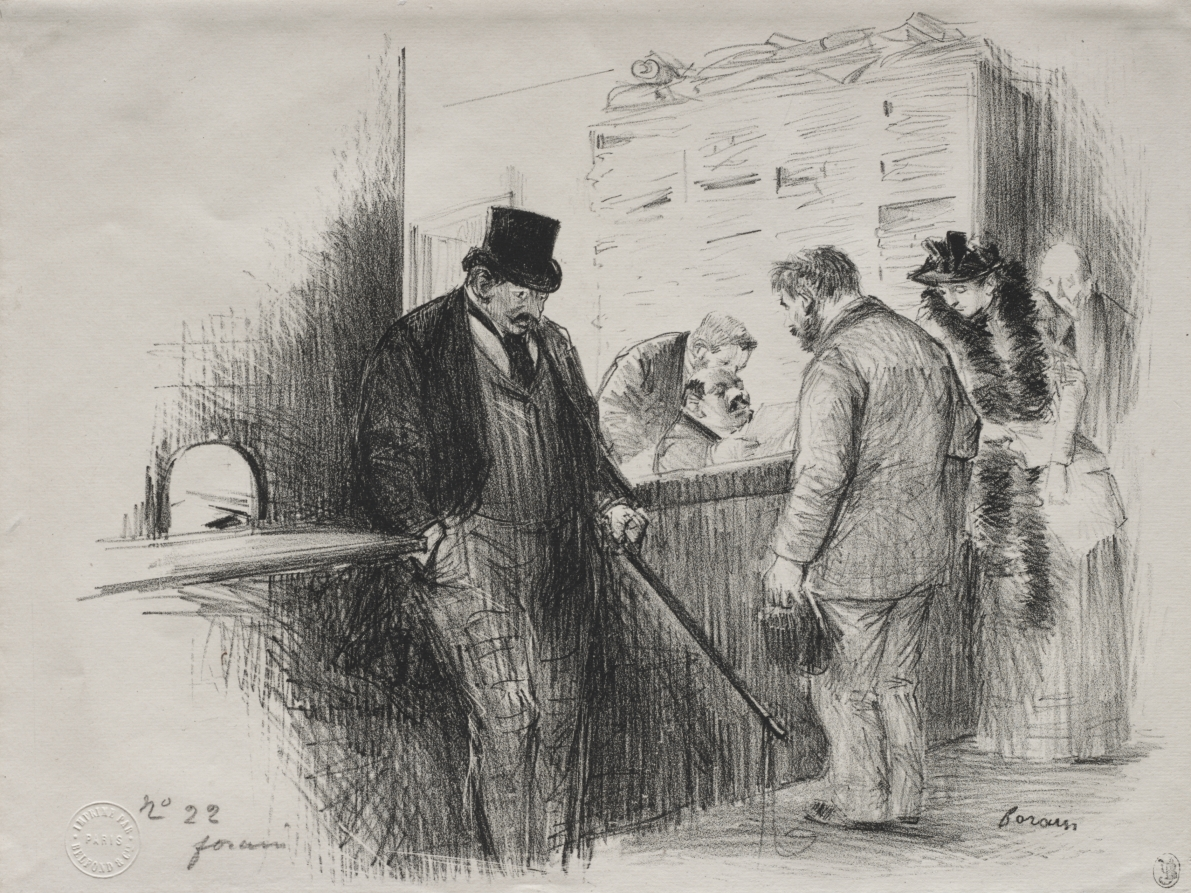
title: Chez l'Huissier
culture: France, 19th-20th century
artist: Jean Louis Forain (French, 1852–1931)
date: 1908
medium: lithograph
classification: Print